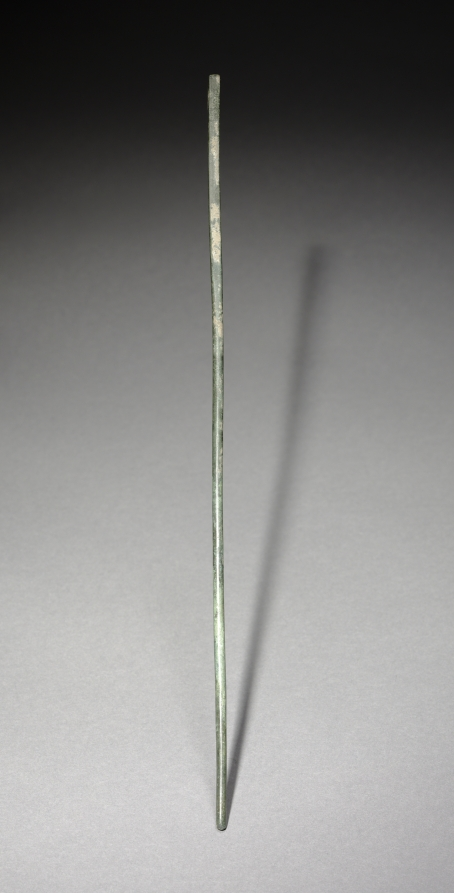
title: Chopstick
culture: Korea, Goryeo dynasty (918–1392)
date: 918–1392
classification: Metalwork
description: In Korea, chopsticks made of metal such as brass, silver, and gold were excavated from ancient tombs and ruins dated to the 6th century at the earliest. Burial goods often include utilitarian objects such as table wares and utensils because the dead were believed to need them in the afterlife.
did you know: In contrast to the Chinese and Japanese, Koreans still prefer metal chopsticks (stainless steel and brass) to wooden ones.